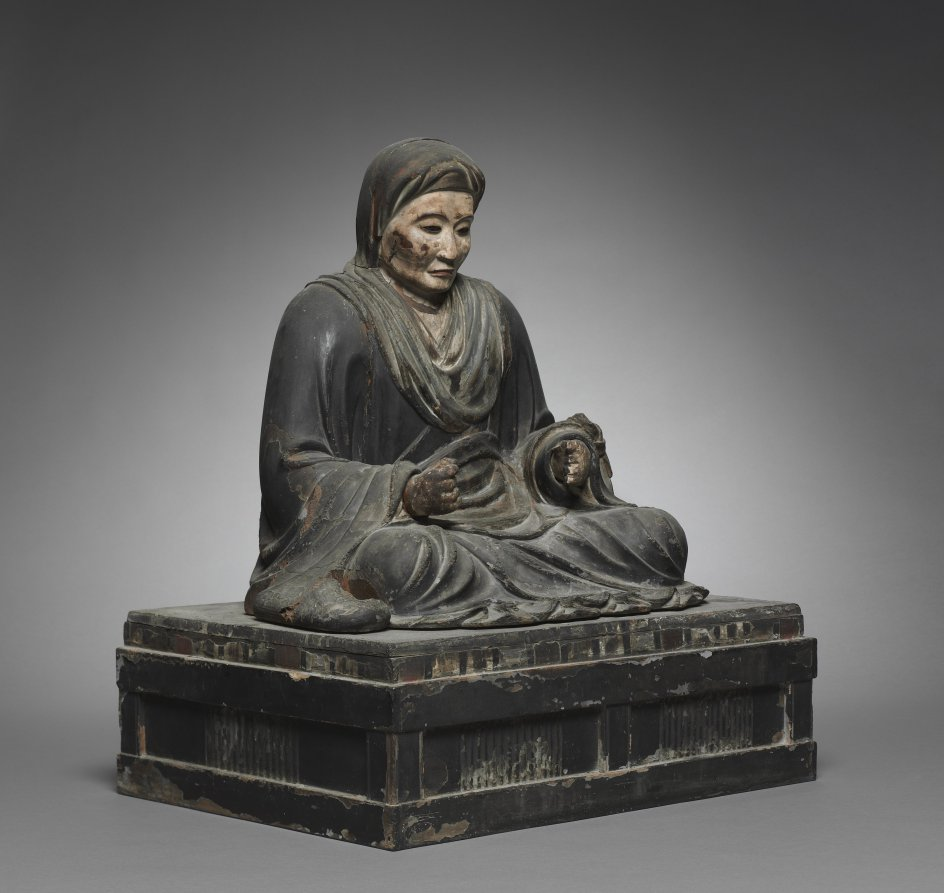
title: Portrait of the Mother of Hotto Kokushi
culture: Japan, Edo period (1615–1868)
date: 1680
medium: wood with polychromy and inlaid crystal and stone eyes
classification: Sculpture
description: This is an imaginary portrait of the mother of the Zen master Hottō Enmyō Kokushi (1203–1298), whose sculptural portrait (1970.67) can be seen in gallery 235B. That image was carved soon after the master's death. His mother's image, however, was completed several hundred years later, so the likeness is doubtful.